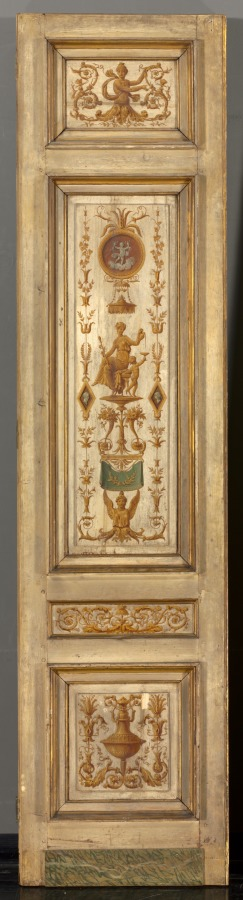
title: Double-leaf Doors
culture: France, 18th century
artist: Pierre Rousseau (French, 1751–1829)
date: 1790s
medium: oil on wood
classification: Painting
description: Shifts in style and taste often result in changes to original architectural details. Rousseau painted these doors with imitation dark wood grain. Another craftsman later scraped off the dark color surrounding the classical designs.